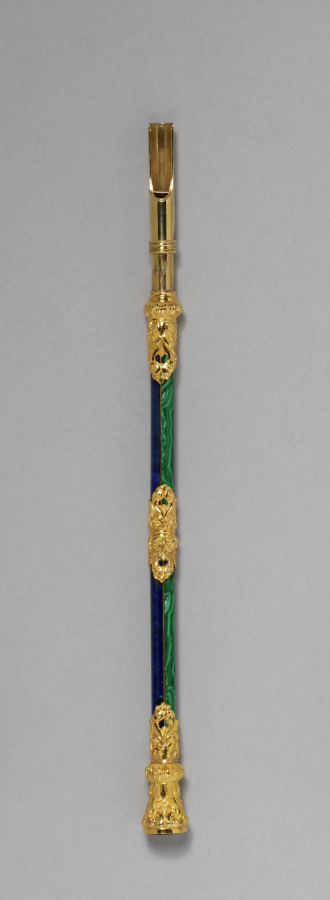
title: Pen from a Writing Set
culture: England, mid-19th century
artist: John Hamilton Mortimer (British, 1740–1779)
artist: and Paul Storr (British, 1771–1844)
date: c. 1830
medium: hardstones including lapis lazuli, malachite, carnelian, agate, gold; original fitted velvet-lined case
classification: Miscellaneous